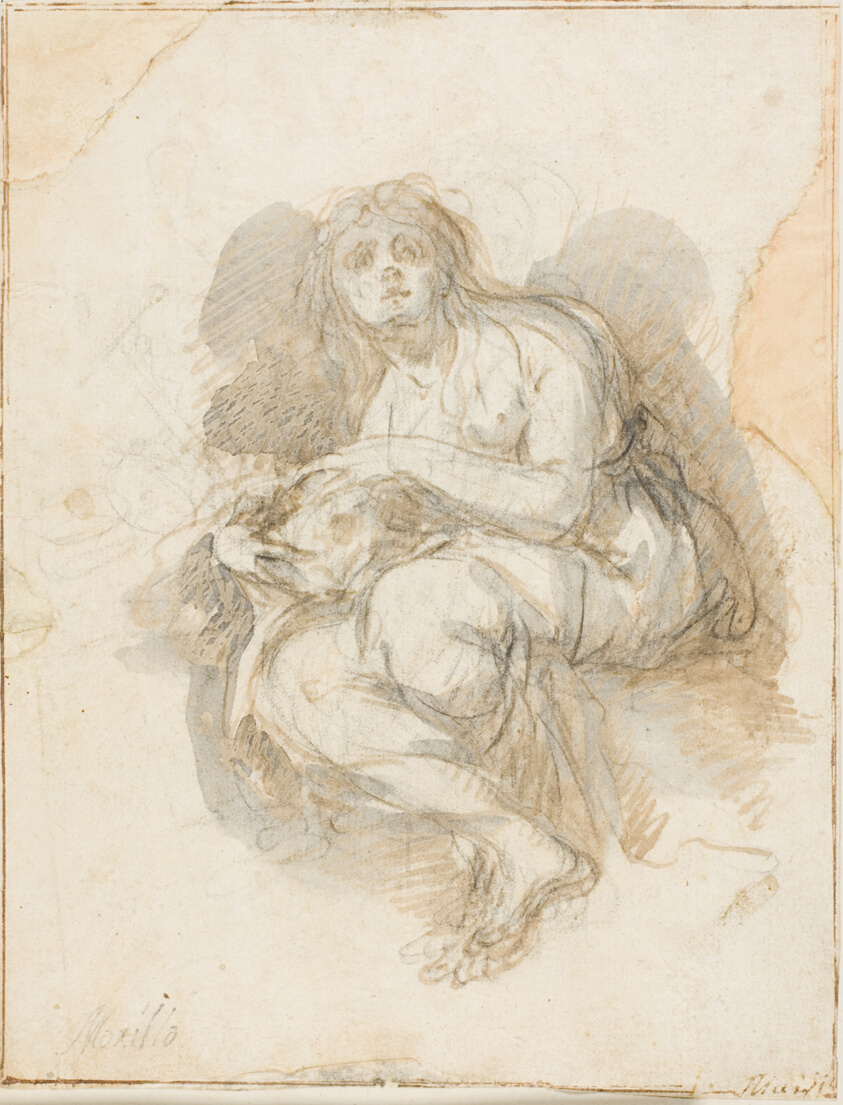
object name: Drawing and Watercolor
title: Female Saint Holding Skull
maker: Possibly Bartolomé Estéban Murillo; Spanish, 1618-1682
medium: Pen and brown ink with brush and gray wash, over black chalk, on ivory laid paper, laid down on ivory wove board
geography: Spain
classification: graphite; drawings (visual works); prints and drawing